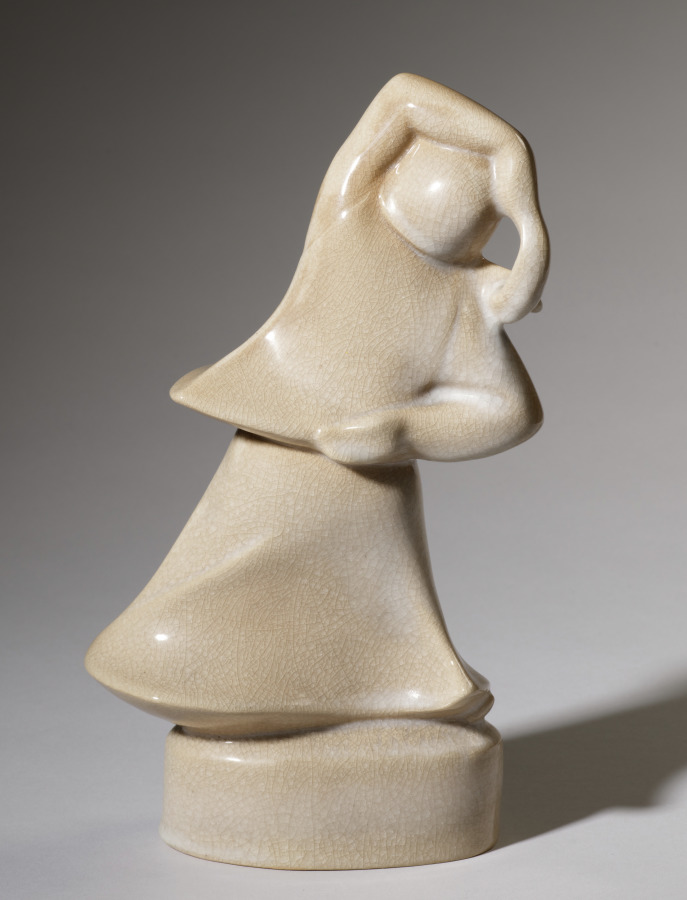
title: Dancer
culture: America, Ohio, Cleveland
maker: Cowan Pottery Studio (America, Rocky River, Ohio, 1920–1931)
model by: Alexander Blazys (American, born Russian Empire [now Lithuania], 1894–1963)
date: 1927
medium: mold-made ceramic, glazed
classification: Ceramic